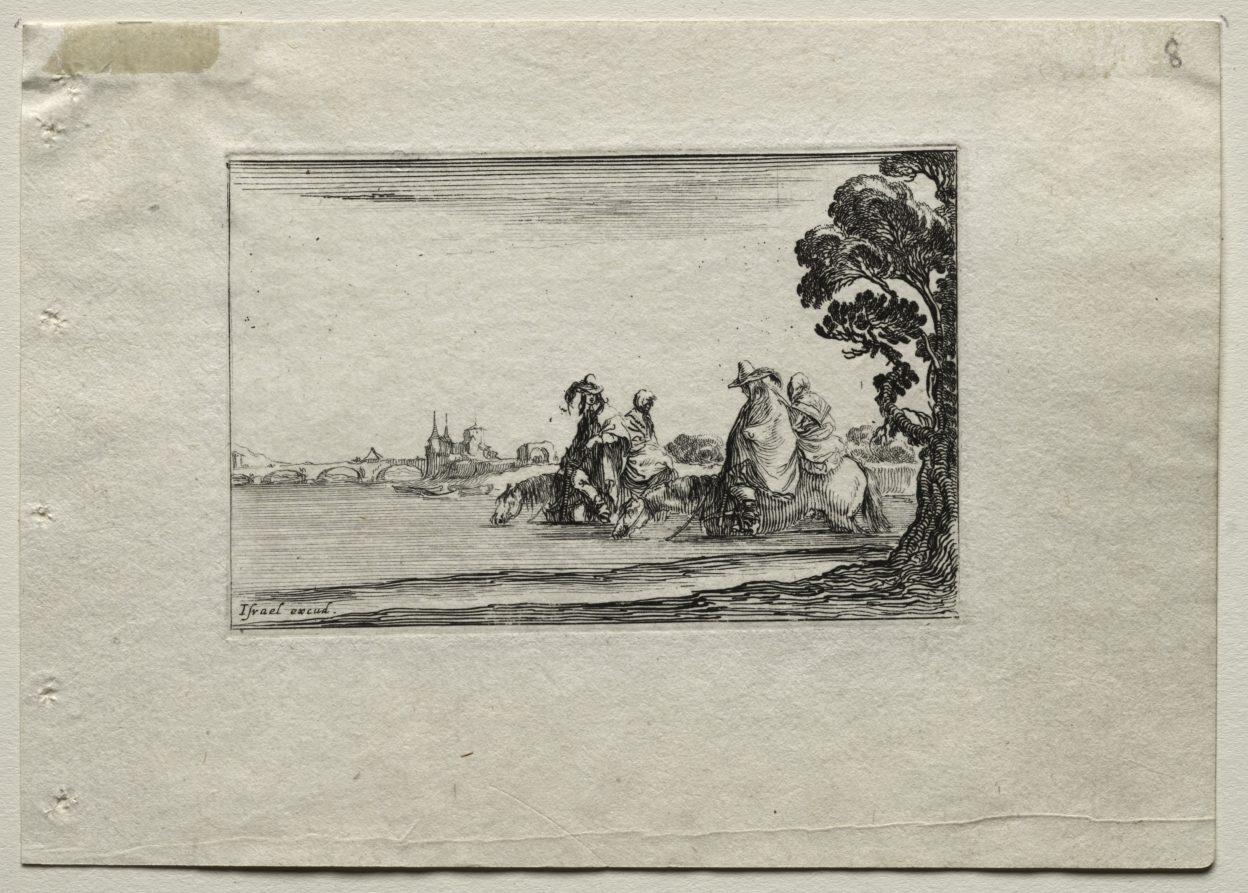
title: Caprices: Cavaliers Watering their Horses in a River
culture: Italy, 17th century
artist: Stefano Della Bella (Italian, 1610–1664)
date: c. 1642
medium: etching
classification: Print